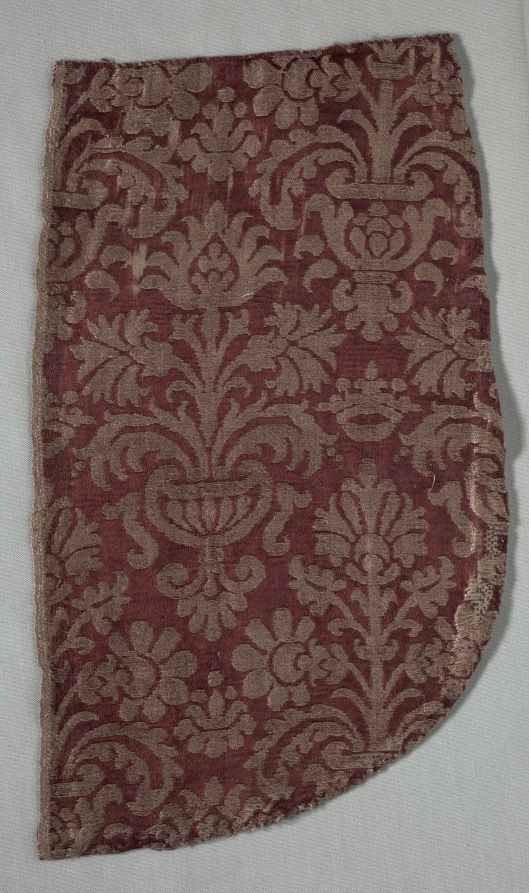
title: Textile Fragment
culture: Italy, 16th century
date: 1500s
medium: damask, silk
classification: Textile